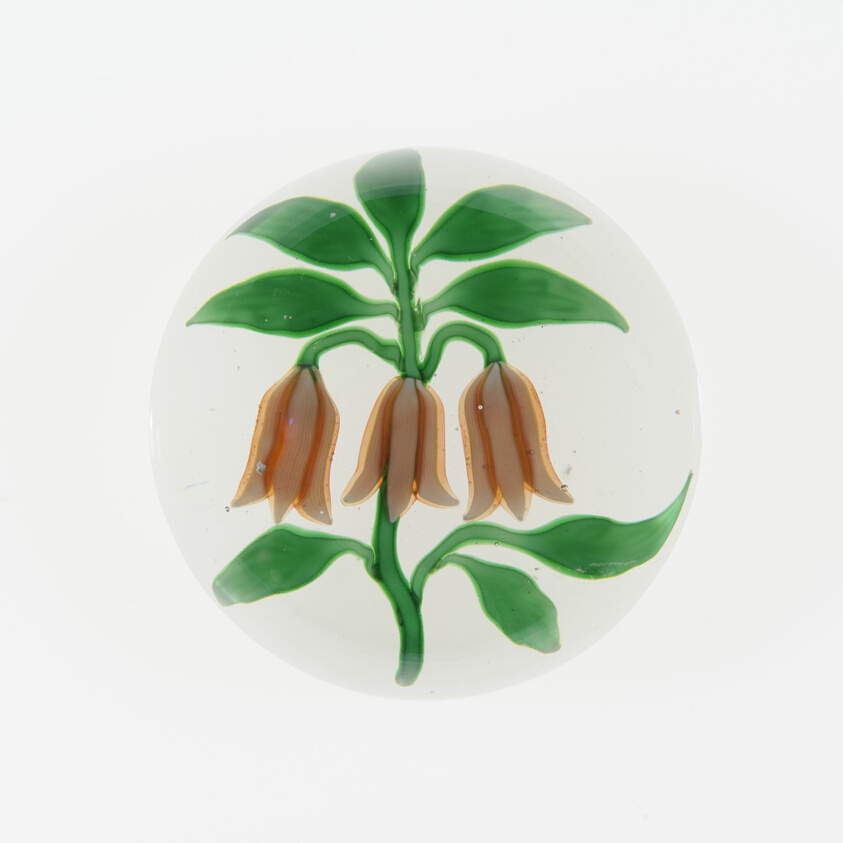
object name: Glass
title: Paperweight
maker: Baccarat Glassworks (Cristalleries de Baccarat); Lorraine, France, founded 1764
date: 19th century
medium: Glass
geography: Baccarat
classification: paperweight; glass